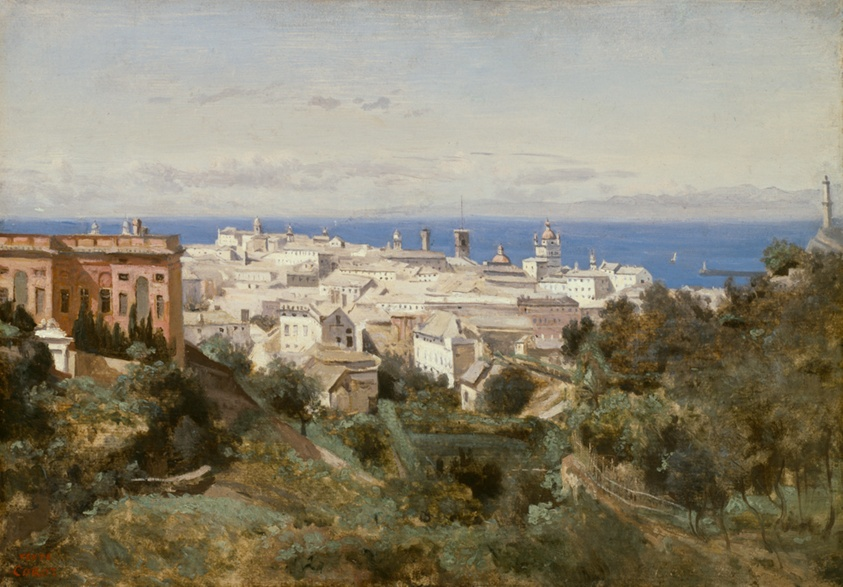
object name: Painting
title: View of Genoa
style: 19th century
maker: Jean-Baptiste-Camille Corot (French, 1796–1875)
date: 1834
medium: Oil on paper mounted on canvas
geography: France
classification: painting; french; oil on paper; oil paintings (visual works); paint; european painting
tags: landscapes, port, cityscapes, Italy, architecture, architecture, architechture, boats, building, buildings, cities, clouds, foliage, hills, ocean, paths, sky, water